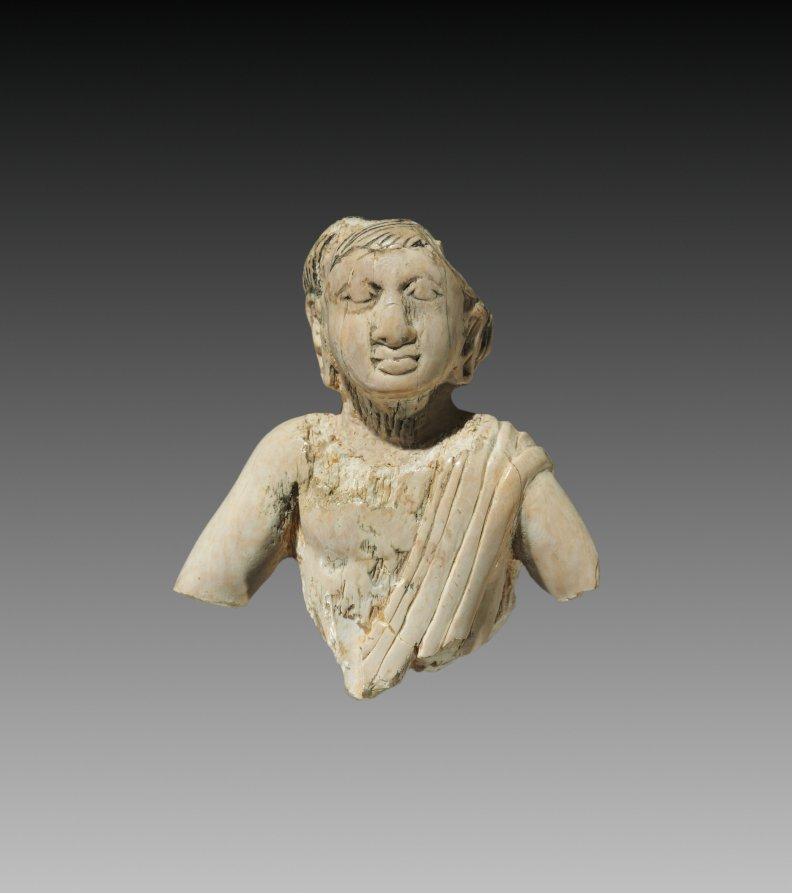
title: Male Bust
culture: Afghanistan, Begram, Kushan period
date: c. 50–320 CE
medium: ivory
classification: Ivory